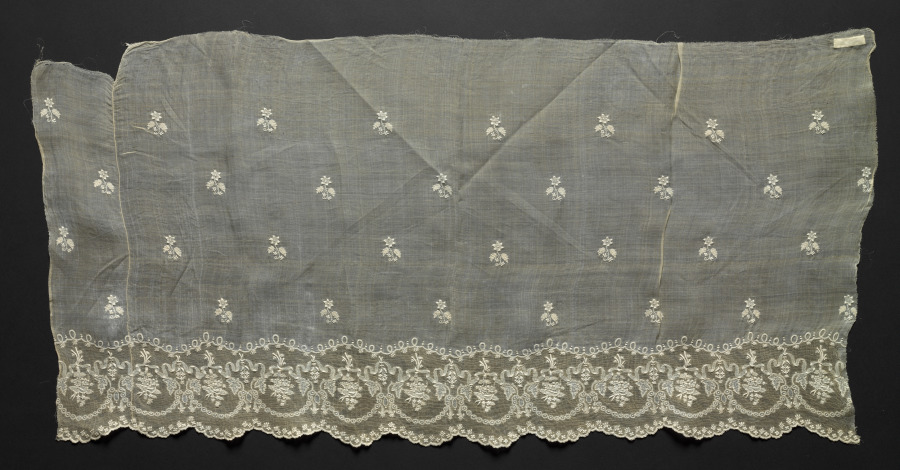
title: Blouse in four pieces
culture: Philippines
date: 1800s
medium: Plain weave piña; needle lace (drawnwork) and white cotton embroidery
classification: Embroidery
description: This group consists of coordinated clothing components made of fine piña cloth in plain weave, all worked in matching hand-embroidered cotton motifs. The set includes a fichu, an unsewn blouse front (pechera), and two unsewn sleeve panels. All four pieces share the same ground material, embroidery thread, and design vocabulary, indicating that they were intended as elements of a single baro-camisa ensemble.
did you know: Because piña is more translucent than abacá, it has historically been considered more prestigious.